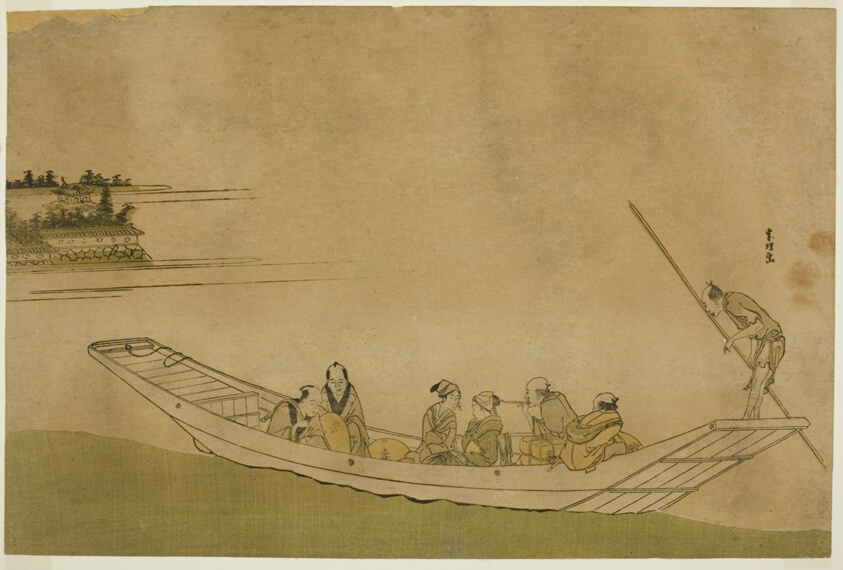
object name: Print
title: Ferryboat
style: Japanese (culture or style)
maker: Katsushika Hokusai 葛飾 北斎; Japanese, 1760-1849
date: c. 1798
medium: Color woodblock print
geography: Japan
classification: woodblock print; print; asian art